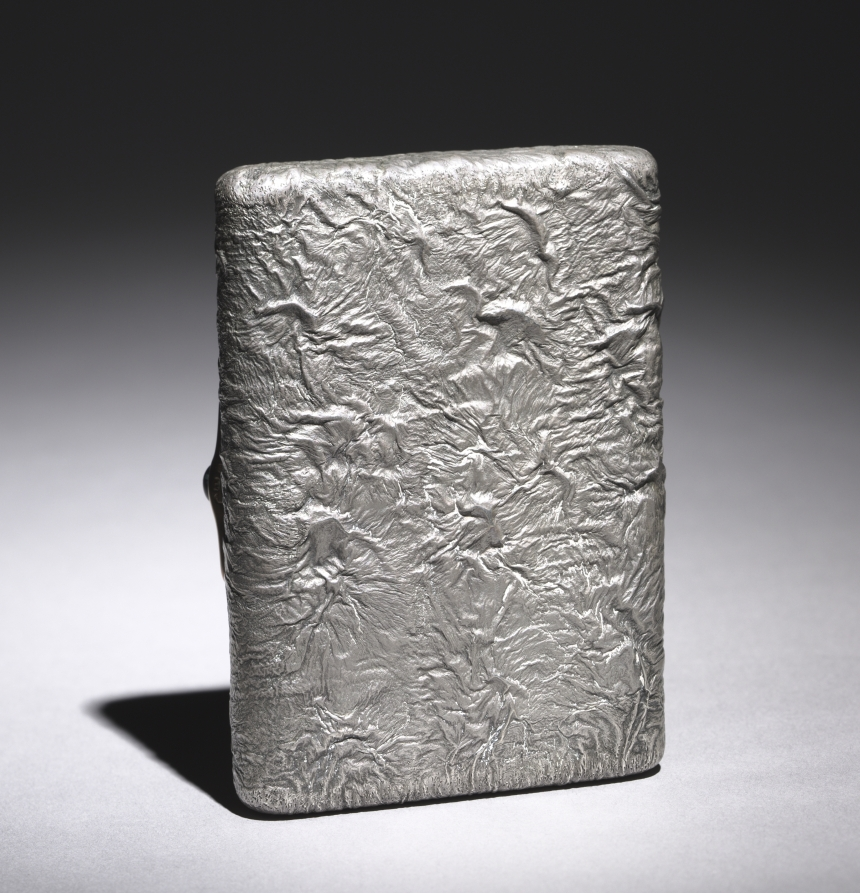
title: Cigarette Case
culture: Russia, St. Petersburg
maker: House of Fabergé (Russian, 1842–1918)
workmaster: Alexander Karpov (Russian)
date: c. 1900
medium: silver, cabochon sapphire mounted in gold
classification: Miscellaneous